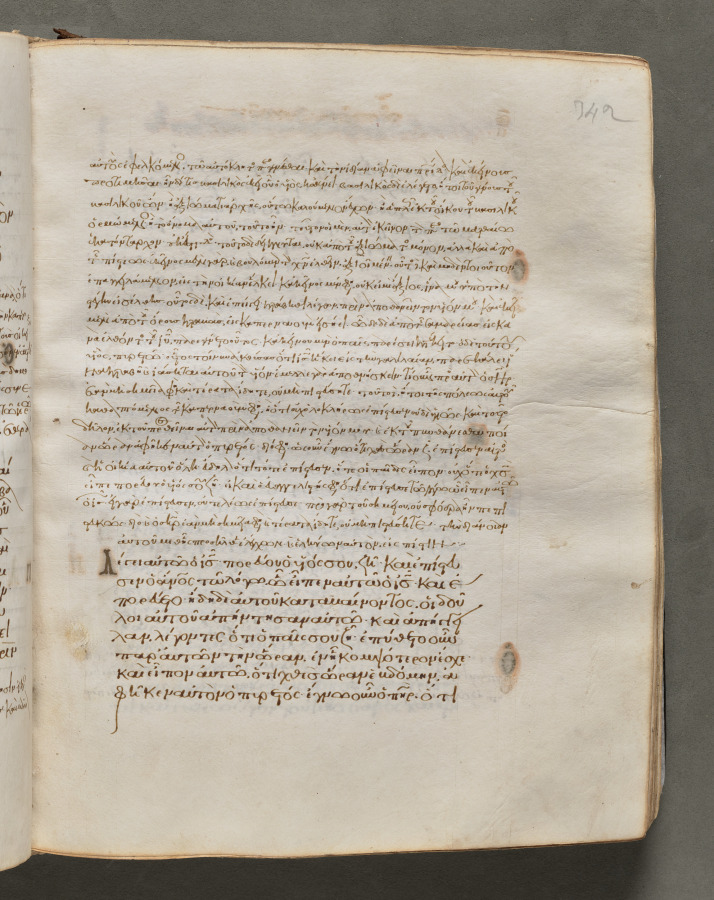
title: Text, folio 342 (recto), from a Gospel Book with Commentaries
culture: Byzantium, Constantinople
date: c. 1000–1100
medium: ink, tempera, and gold on vellum; leather binding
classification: Bound Volume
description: Each of the four gospels in this book opens on a page with brilliantly illuminated borders depicting the author of the text as well as birds—principally peacocks, symbols of the immortality of the soul—and fountains, representing the fountain of life and the salvation of the soul. This volume consists of 428 leaves with texts in Greek. Its level of sophistication suggests that it was probably written and decorated in a monastery in Constantinople.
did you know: Gospel books were carried in procession through Byzantine churches.